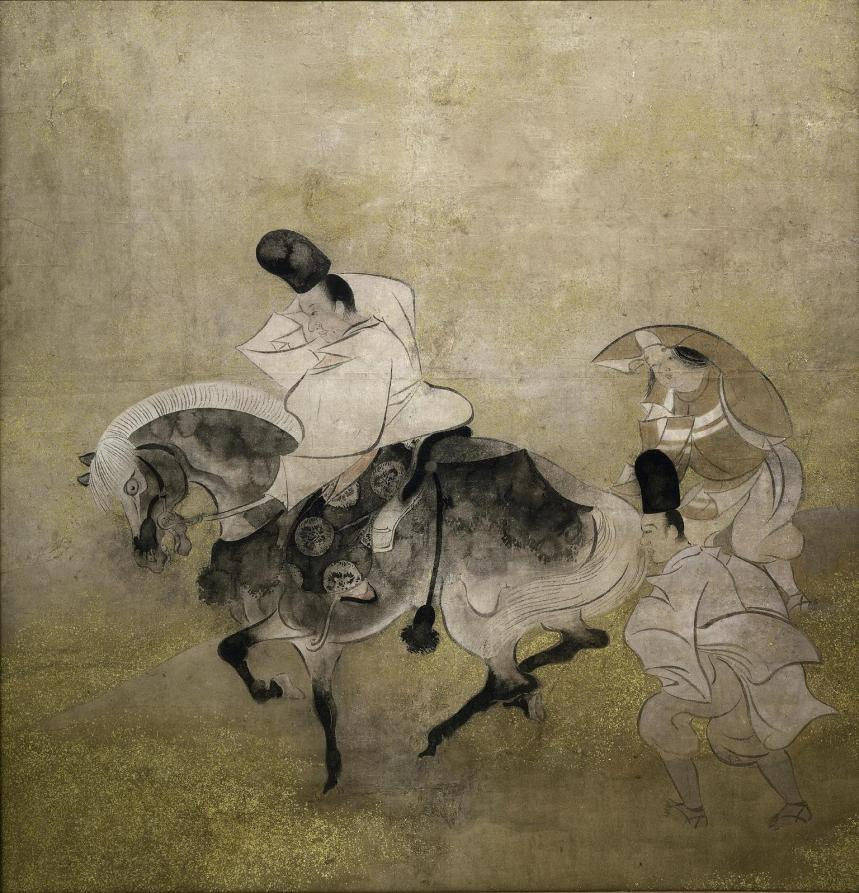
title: Crossing at Sano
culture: Japan, Edo period (1615–1868)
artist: studio of Tawaraya Sōtatsu (Japanese, c. 1570–c. 1640)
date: c. 1600–1640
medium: Hanging scroll mounted as a single-panel screen; ink, color, and gold on paper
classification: Painting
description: Like many paintings from the Sōtatsu studio, a Kyoto-based atelier that ran the shop Tawaraya, this one is done in ink, mineral colors, and gold, and is formally reminiscent of 12th- and 13th-century paintings associated with the Japanese aristocracy. It depicts a man on horseback with two attendants crossing a bridge that once spanned the Kino River in Sano in eastern Wakayama Prefecture. The composition was inspired by a poem by Fujiwara no Teika (1162–1241) that translates as follows: I stop my horse, but there is no shelter as I brush off my sleeves at Sano Crossing in the evening snow.